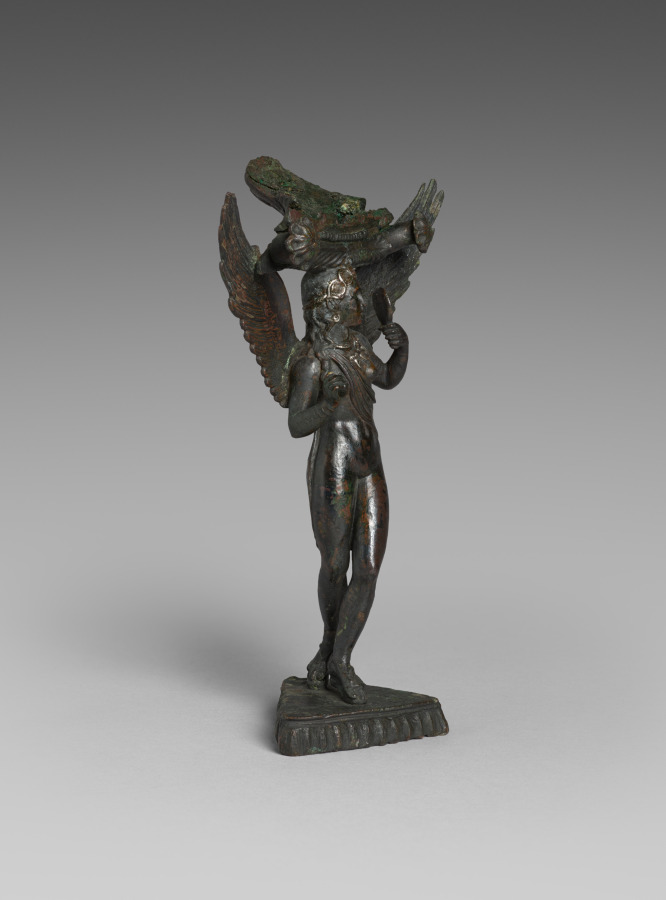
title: Patera Support: Lasa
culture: Etruscan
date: 300–175 BCE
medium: bronze with silver inlays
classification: Sculpture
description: Standing on a triangular base, this winged female figure twists her body while admiring herself in the small mirror held in her left hand. Nearly nude, she wears sandals as well as a leopard or panther skin and jewelry inlaid with silver. Above her head and wings, a small portion of a patera, or shallow offering dish, survives. Inscriptions identify similar winged female figures elsewhere in Etruscan art as Lasas, often together with Turan (an Etruscan goddess analogous to the Greek Aphrodite).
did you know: This elaborate figure served as a handle or support for a patera, a shallow dish.